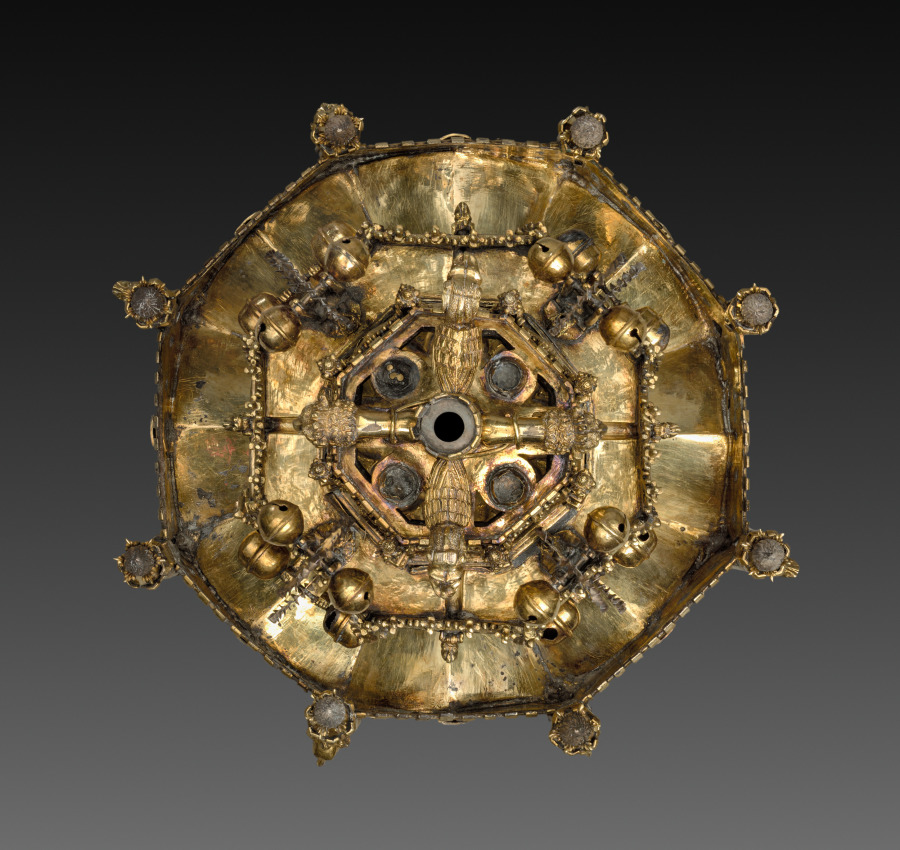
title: Table Fountain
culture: France, Paris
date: c. 1320–40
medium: gilt-silver and translucent enamels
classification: Metalwork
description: Conceptually and stylistically, this object is beyond all else a piece of Gothic architecture in miniature with vaults, pinnacles, columns, and traceried arches. Though the artist who created it is unknown, he was unquestionably inspired by the great Gothic buildings of his time. The table fountain is a three-tiered assembly combining cast elements with bent sheets of gilt-silver. To these have been attached a series of enamel plaques representing grotesque figures, some of which play musical instruments. Water wheels and bells were added to capture motion and sound. The rich detail, precious materials, and involved ornamentation of this deluxe object suggest it would have been expensive to produce and highly treasured by its original owner, someone of high status, and would have been deployed as an object of spectacle. This is the most complete example of its type known to survive from the Middle Ages. Medieval inventories reveal that small fountains like this, often taking various forms, and generally made from precious metals, once existed in large numbers, thus making the Cleveland table fountain an extremely rare object.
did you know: This fountain with its minute architectural details and finely made enamel plaques displayed the wealth and refinement of the owner as it entertained his guests. Imagine hearing the ringing of the tiny bells when this fountain was in use.